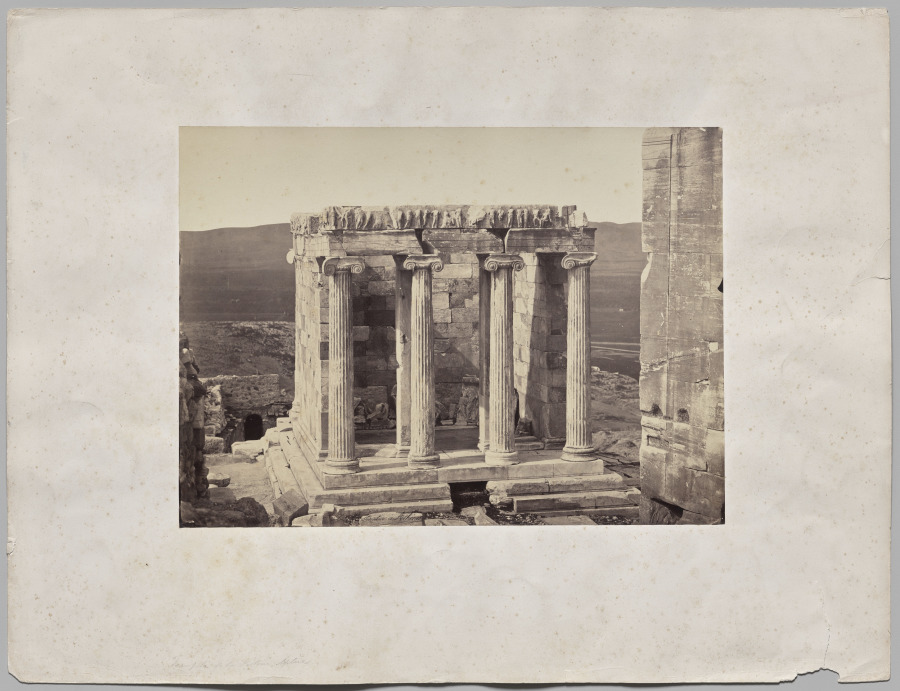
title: Temple of Athene Nike. Venus Victrix—Wingless Victory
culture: Greece, 19th century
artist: Dimitrios Constantin (Greek, 1820–1900)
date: c. 1850s–60s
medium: albumen print from collodion negative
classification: Photograph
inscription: In black in, center of image, recto: “D. Constantin d’Athéns”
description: Here we see a monument of ancient Greece through the eyes of a nineteenth-century Greek. This temple on the Acropolis in Athens, completed around 420 BC, was dedicated to the goddesses Athena and Nike, both of whom represented being victorious in war.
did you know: Dimitrios Constantine, who opened a studio in 1858, was probably the second professional photographer in Greece.